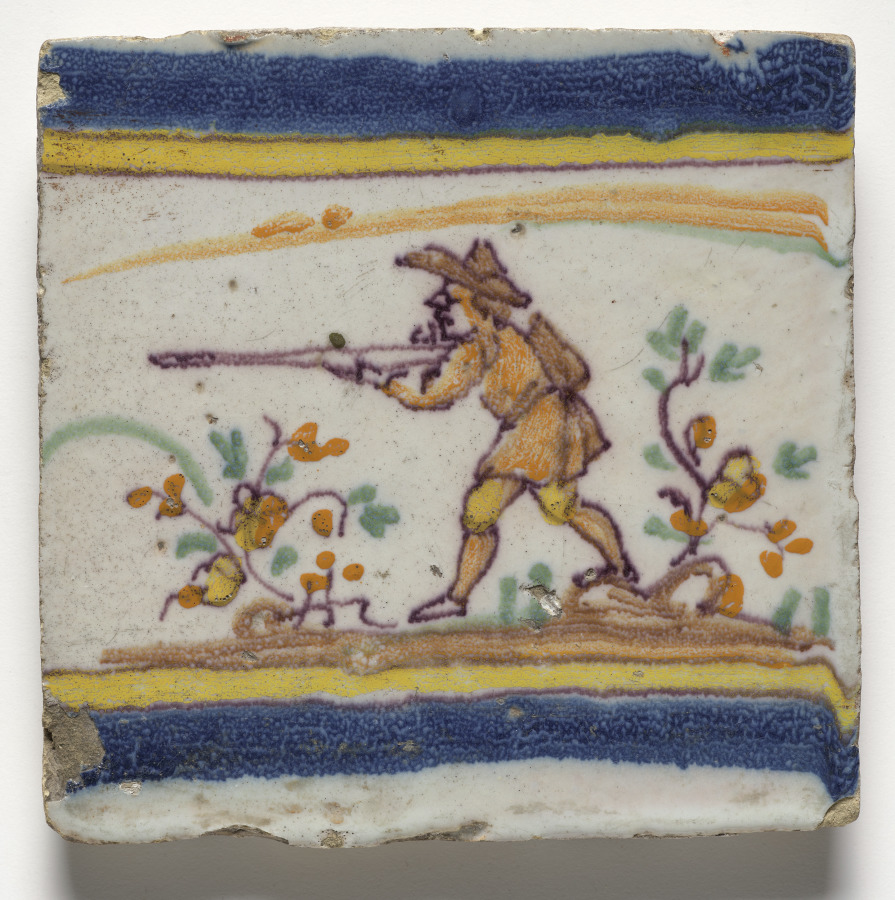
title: Wall Tile–Hunter with Rifle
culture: Spain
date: c. 1600s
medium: glazed ceramic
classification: Ceramic